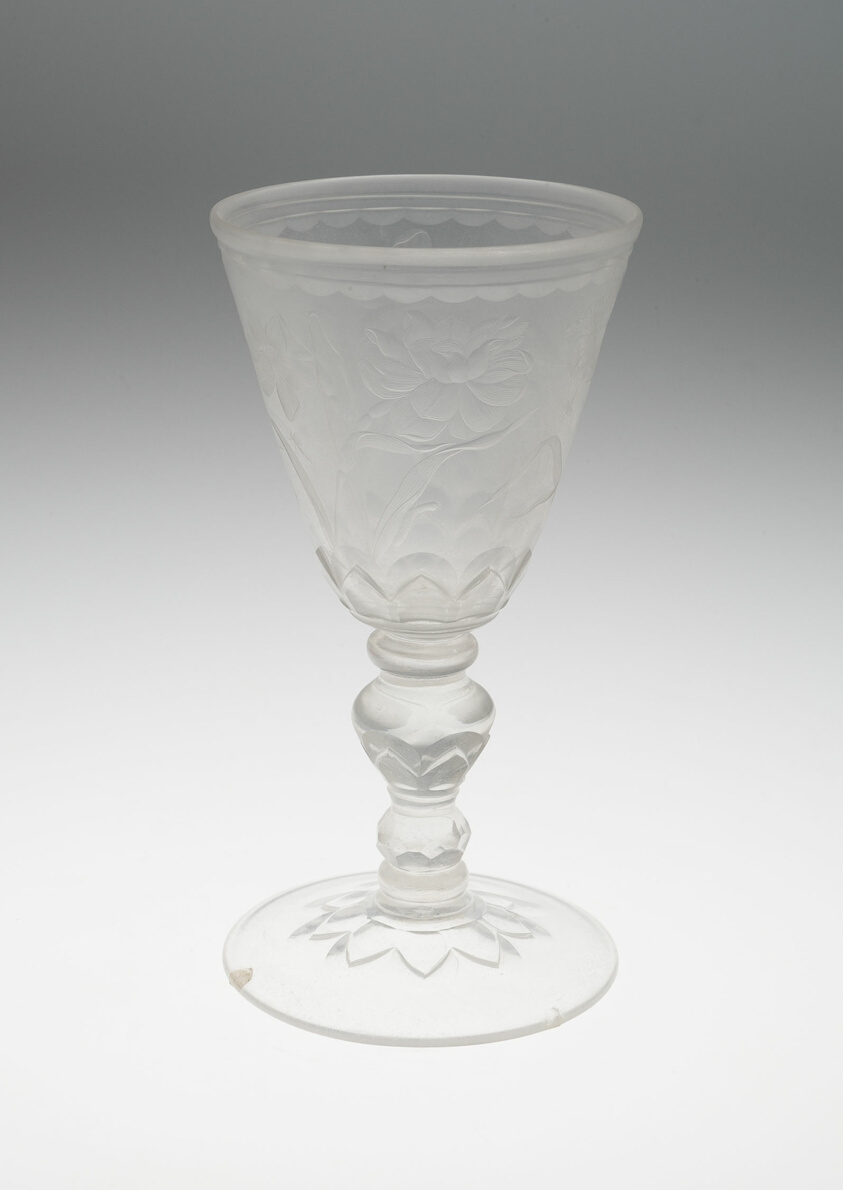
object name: Glass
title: Goblet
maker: Germany, Potsdam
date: c. 1700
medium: Glass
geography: Potsdam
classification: drinking vessel; glass; european decorative arts